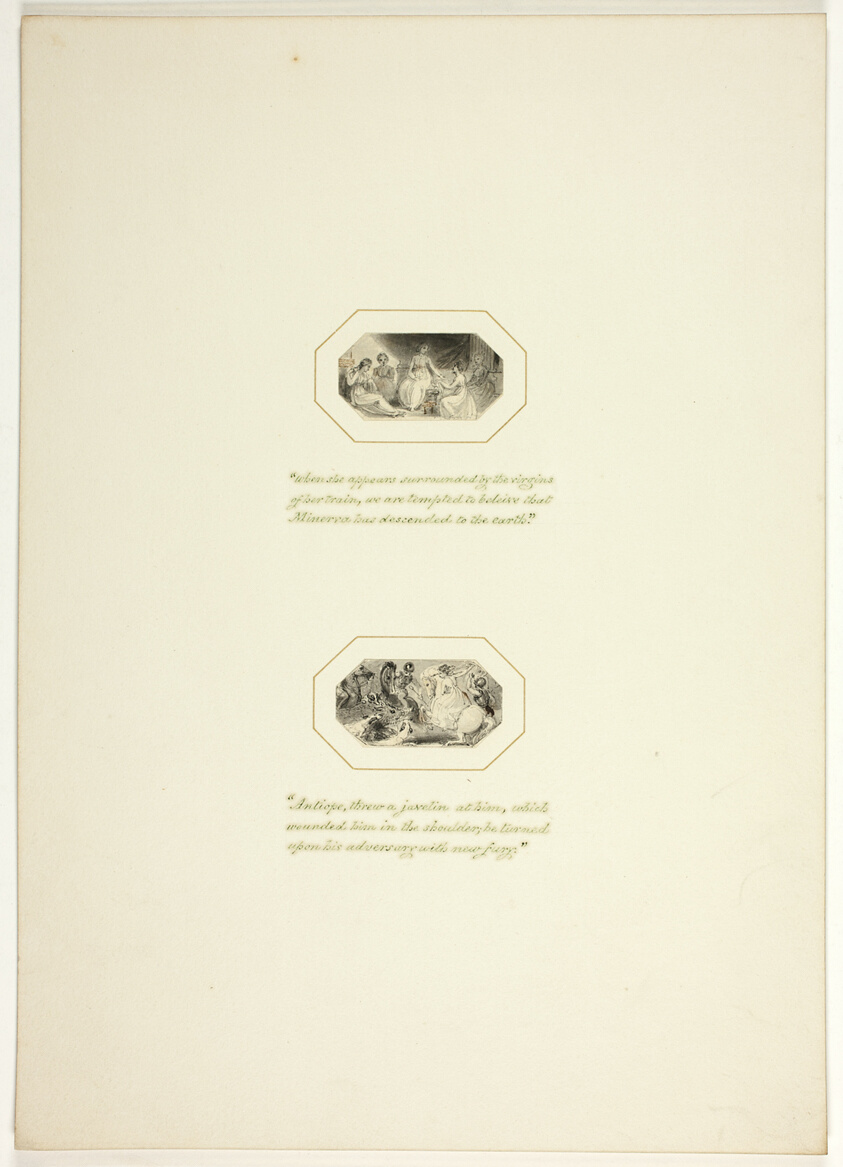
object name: Drawing and Watercolor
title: Study for a plate from Telemachus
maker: Thomas Stothard (English, 1755-1834)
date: c. 1797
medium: Ink wash on paper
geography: England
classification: ink or chalk wash; drawings (visual works); prints and drawing